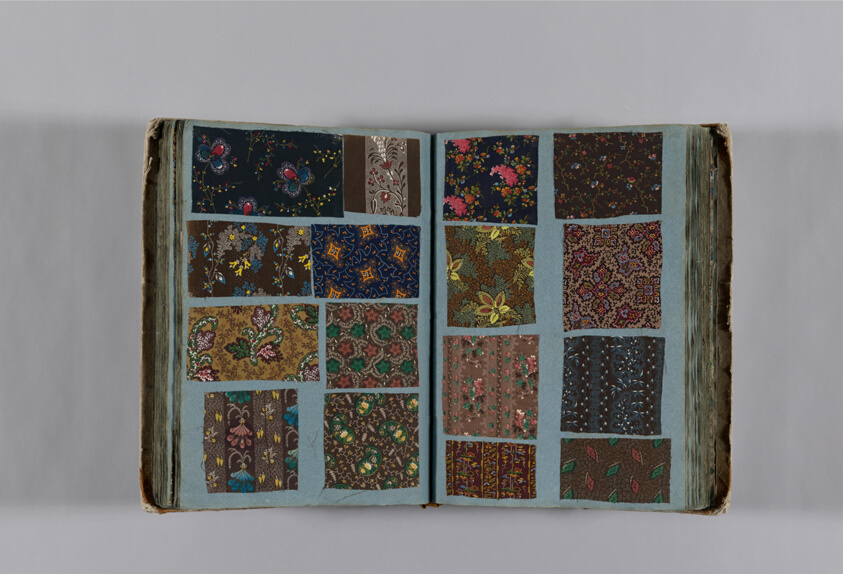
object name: Book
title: Sample book of swatches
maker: Mulhouse, France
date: 19th c.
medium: Sample book of swatches: cotton, plain weave, block printed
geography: France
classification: book; printed; weaving - printed